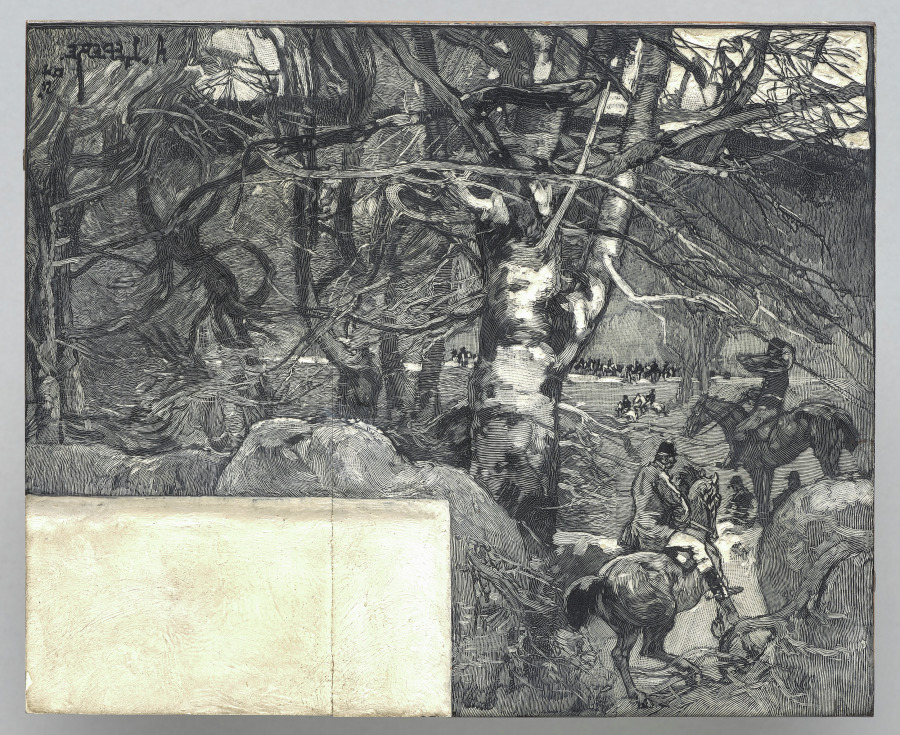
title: Une Chasse à Courre, Mont Gérard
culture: France, 19th-20th century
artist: Auguste Louis Lepère (French, 1849–1918)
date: 1887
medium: woodblock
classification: Woodblock